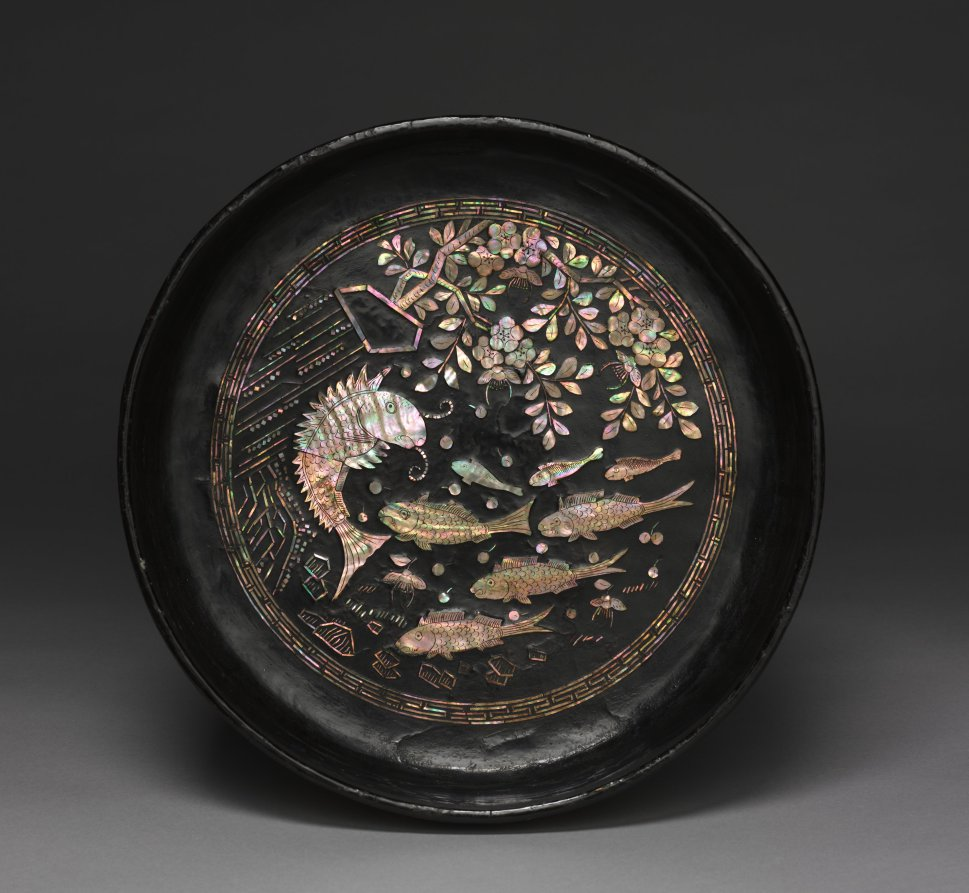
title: Tray for Sewing Tools with Mother-of-Pearl Inlay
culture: Korea, Joseon dynasty (1392–1910)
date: 1800s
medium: lacquer with mother-of-pearl inlay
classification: Lacquer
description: This mother-of-pearl lacquer tray is decorated with various scenes of animals interacting with their natural surroundings. Its flat circular base depicts a pond where a leaping carp and a small school of fish swim below the boughs of a cherry tree. The tray’s exterior wall is densely decorated with various animals paired with plants symbolizing wishful thoughts of longevity, marital happiness, and prosperity.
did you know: Many thin layers of lacquer were applied to the tray's leather core. The design was cut into the dry lacquer and then the mother-of-pearl was inserted.